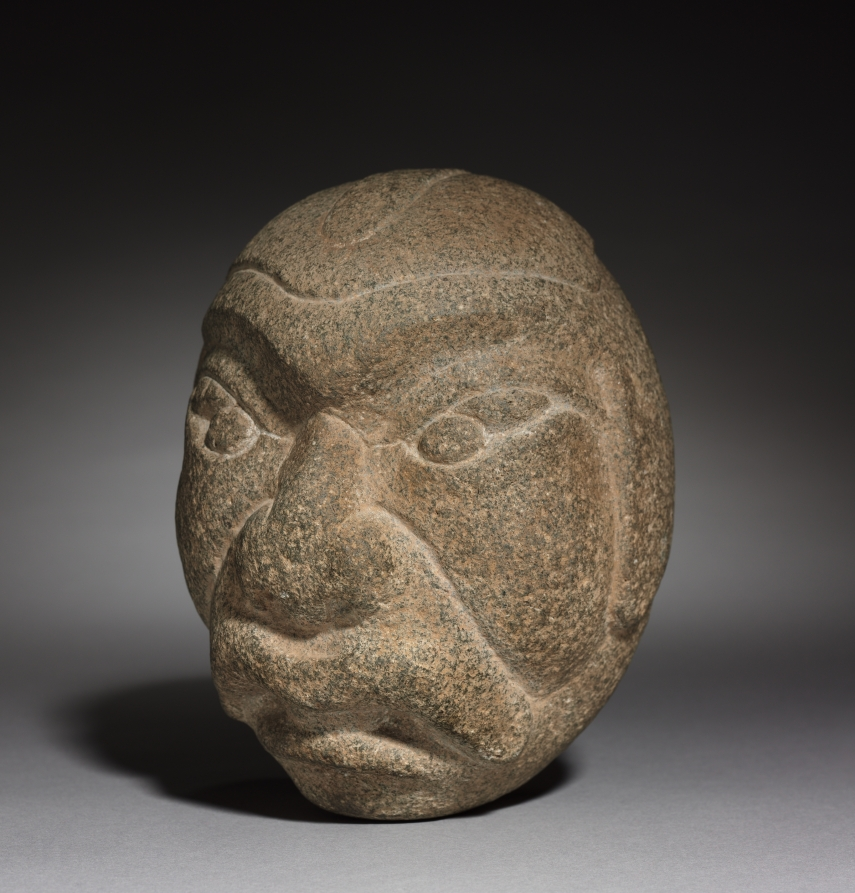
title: Head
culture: Mesoamerica, Mexico, Olmec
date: 1200–300 BCE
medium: stone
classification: Sculpture